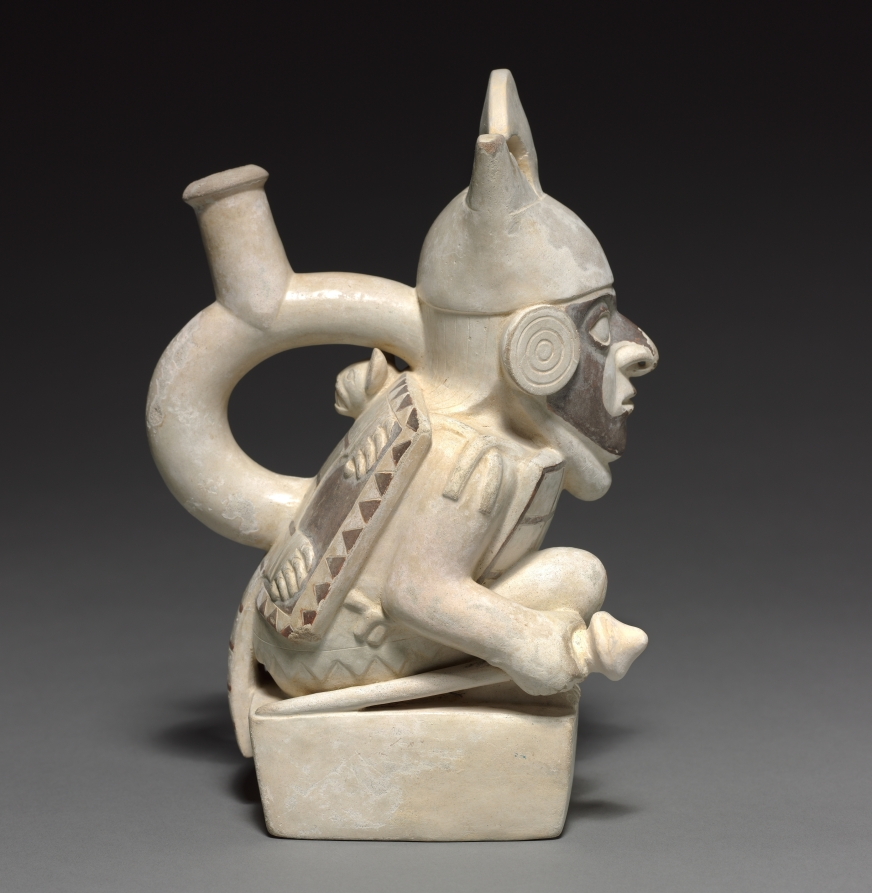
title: Warrior Vessel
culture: Peru, North Coast, Moche, Moche style (50-800)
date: c. 50–200 CE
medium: earthenware with colored slips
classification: Ceramic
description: This vessel's exquisite, crisp detail rewards careful viewing. The modeling of the feline pelt on the back is especially delicate and sharp, and each of the squares on the tunic carries a tiny dot in the upper corners, as though the squares represent plates of metal or shell attached to fabric. The face is decorated with paint or tattooing, and the headdress supports a curved, blade-shaped form.